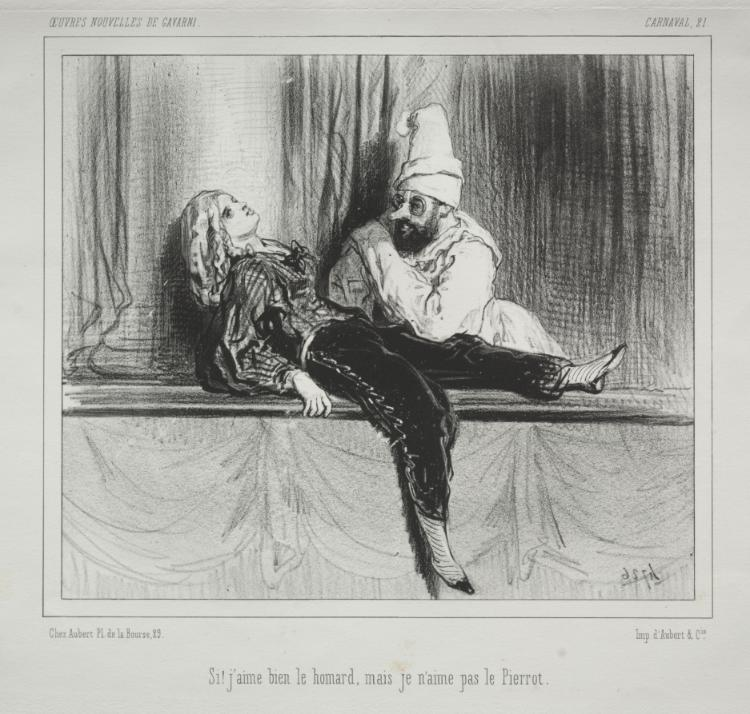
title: Carnaval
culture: France, 19th century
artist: Paul Gavarni (French, 1804–1866)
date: c. 1841–47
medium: lithograph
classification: Print